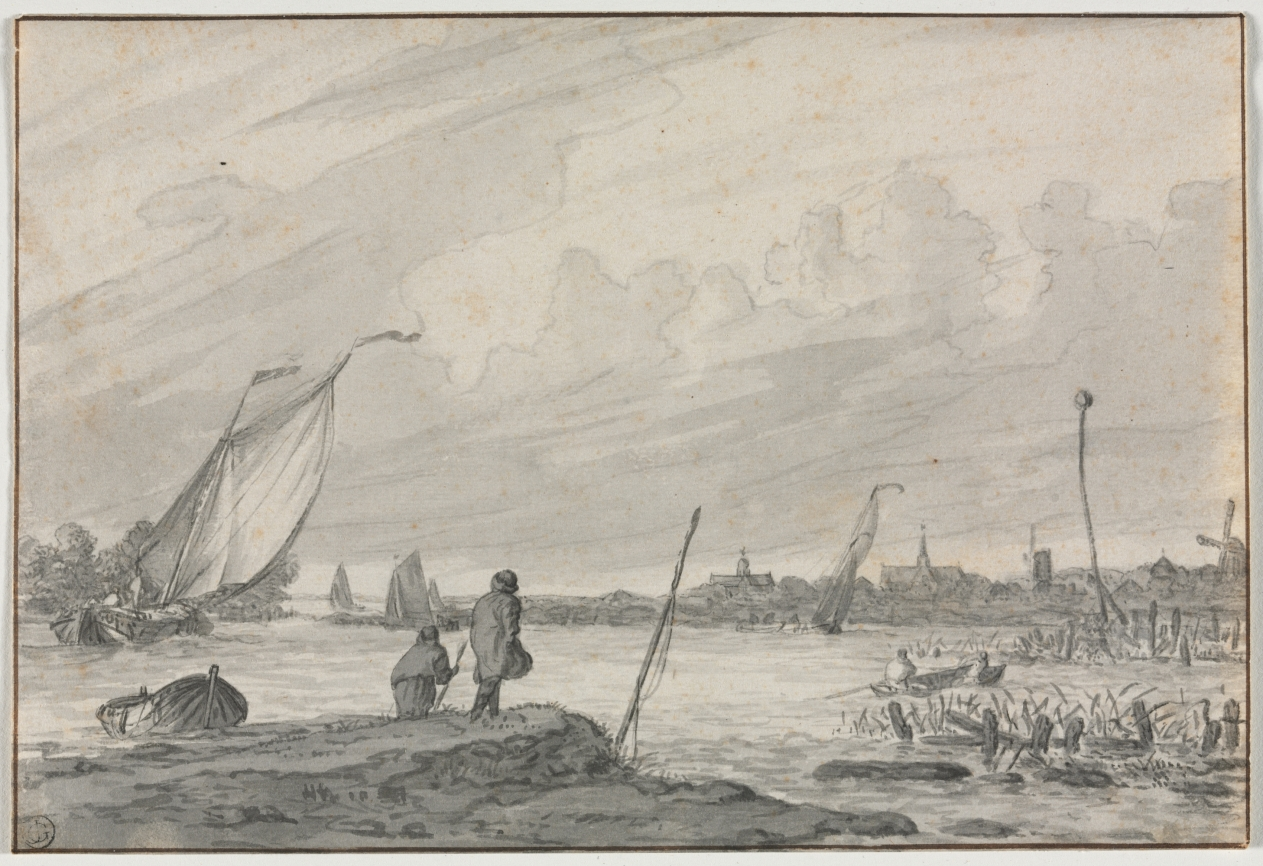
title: View of Alkmaar with Boats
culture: Netherlands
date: 1600s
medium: point of brush and gray ink and brush and gray wash with traces of pen and black ink over traces of graphite; framing lines in brown ink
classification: Drawing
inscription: VERSO, upper right, in graphite: 25[n?] ; upper right, in graphite: 105 [circled] ; left center, in graphite: [illegible] 300 - (underlined, mostly erased); [Fb?]0 ; B[illegible] / 502 [slash part of inscription] ; center, in graphite: A520[7?] ; lower left, in graphite, beneath CMA stamp: [illegible]e ; lower left, in graphite: N65 [illegible] ; in brown ink: p 5 ; in graphite: 15; in black ink: No 31. ; lower center, in graphite: Ludolf Backhuysen. / Collections Sybouts, Lembruggen / et Gigoux.